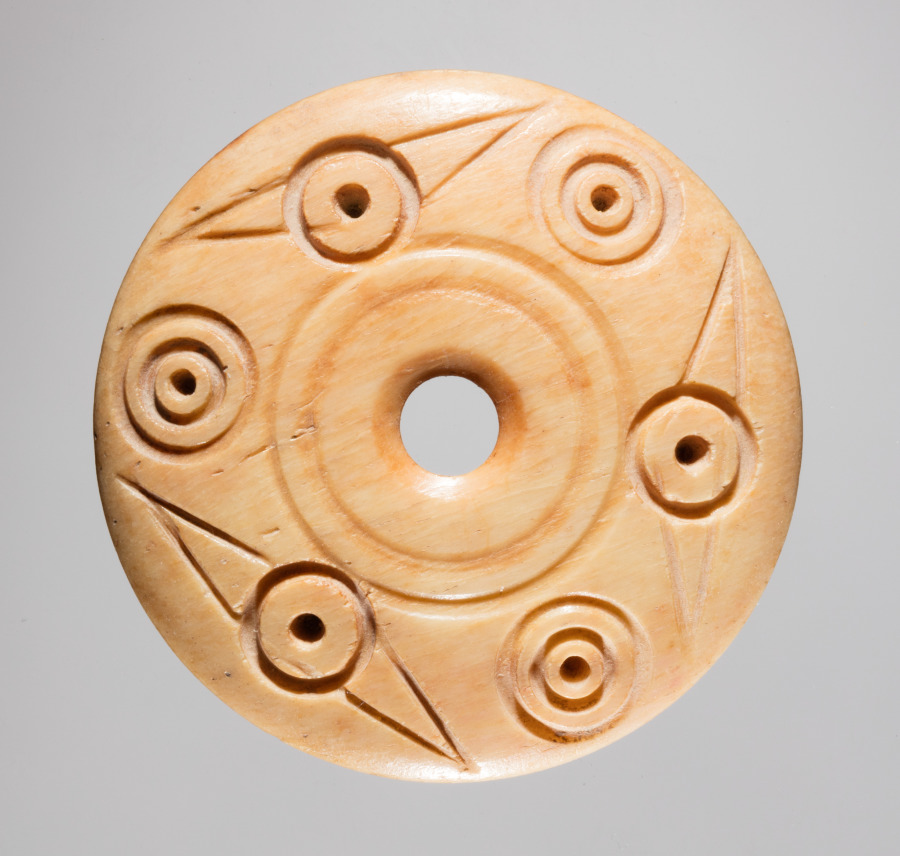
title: Spindle Whorl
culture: Iran, early Islamic period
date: 700s - 900s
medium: bone, incised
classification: Spindle Whorl